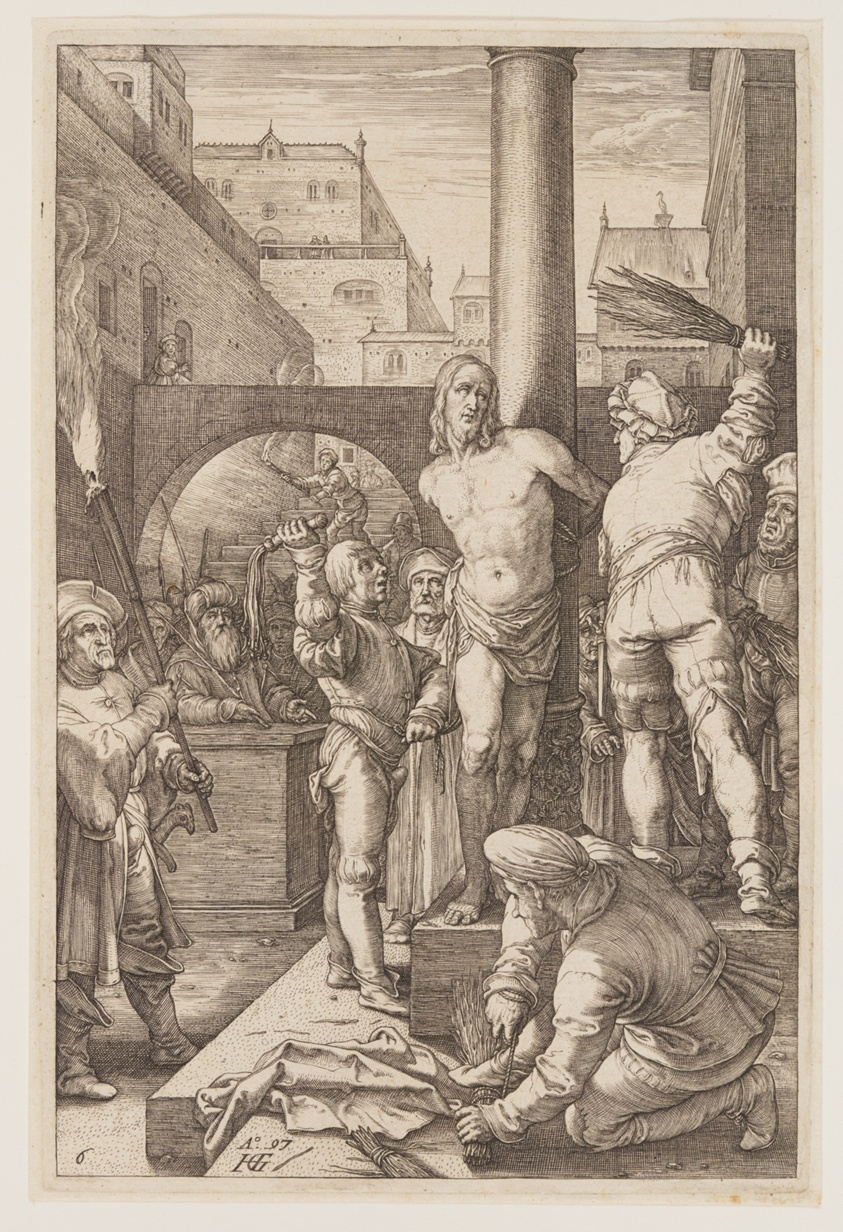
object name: Print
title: The Flagellation, from The Passion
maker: Hendrick Goltzius (Dutch, 1558–1617)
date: 1597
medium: Engraving on ivory laid paper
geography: Netherlands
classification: engraving; paper; print; prints and drawing